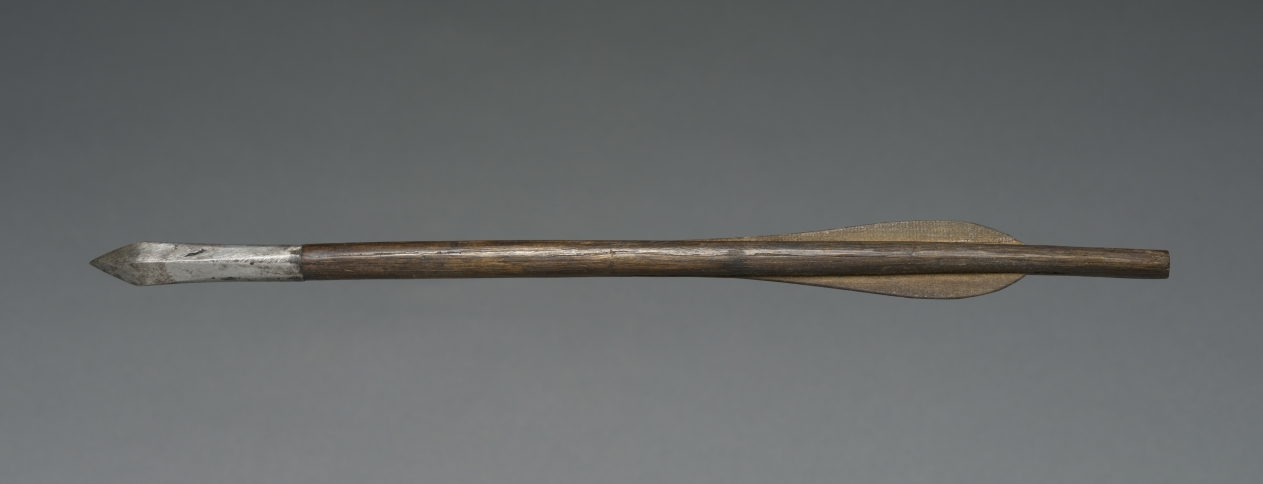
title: Crossbow Bolt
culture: Germany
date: 1500s–1600s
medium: wood, leather, steel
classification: Arms and Armor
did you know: Bolts with leather feathering were used mainly in the Tyrolean area, which includes northern Italy and western Austria.